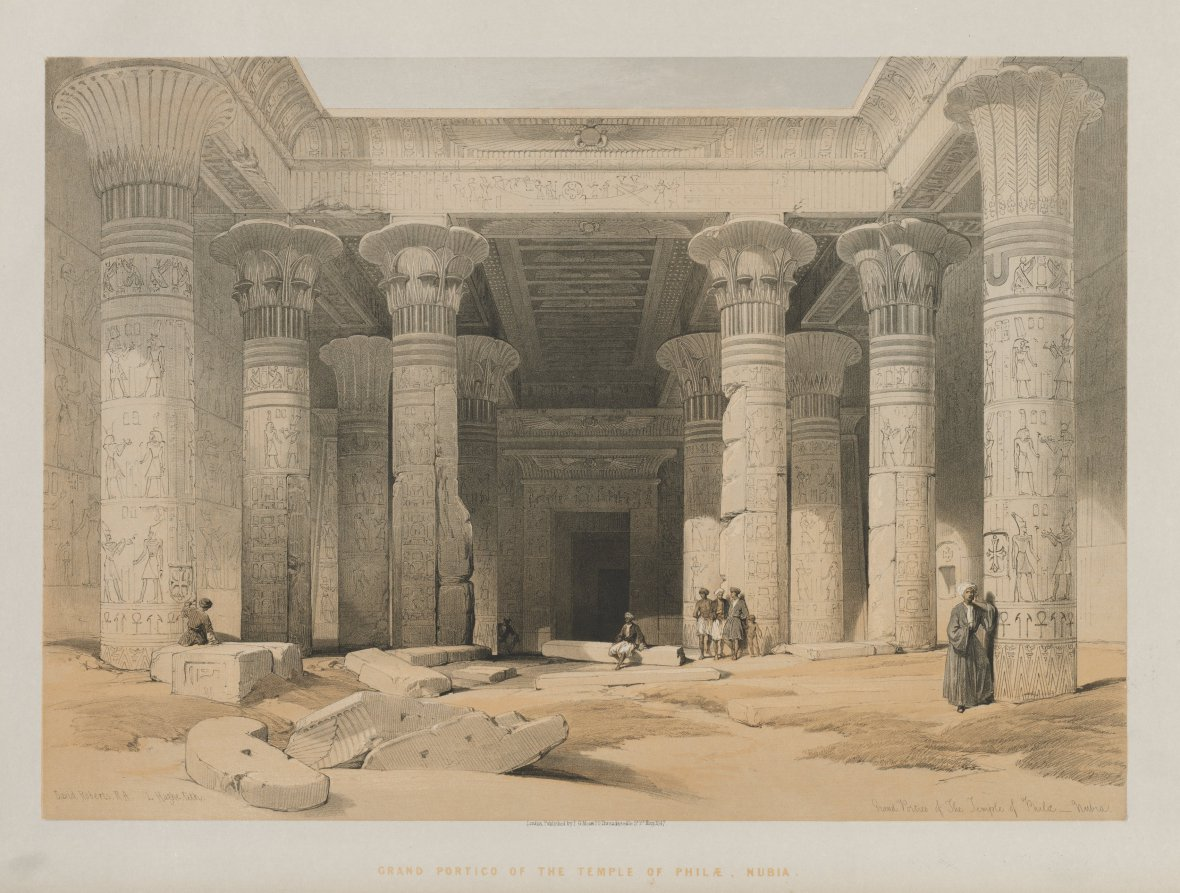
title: Egypt and Nubia, Volume I: Grand Portico of the Temple of Philae, Nubia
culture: England, 19th century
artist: Louis Haghe (British, 1806–1885)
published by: F. G. Moon, 20 Threadneedle Street, London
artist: after David Roberts (Scottish, 1796–1864)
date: 1847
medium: color lithograph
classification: Print